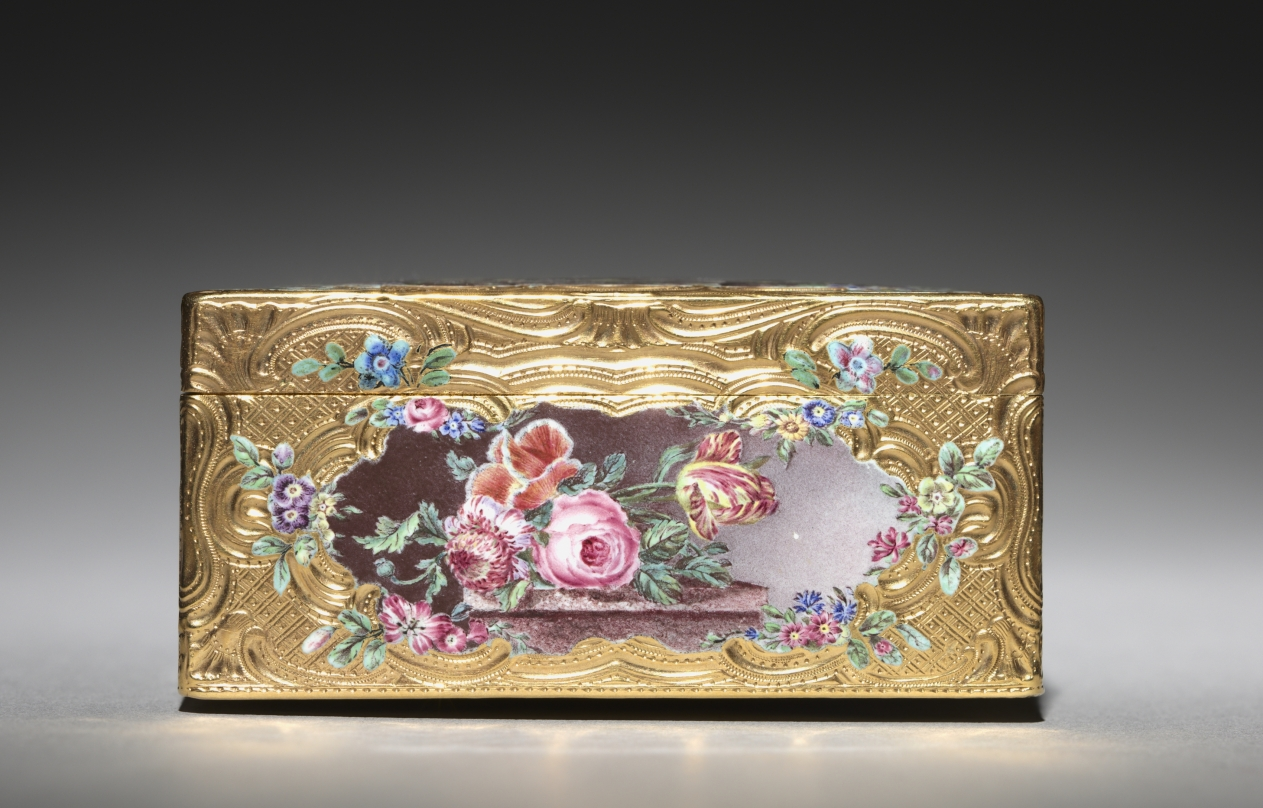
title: Snuff Box (Tabatière)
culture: France, 18th century (style of Louis XV)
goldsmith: Francois Guillaume Tiron (French)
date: 1756–57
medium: gold and enamel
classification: Miscellaneous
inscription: [Maker's mark of Francois-Guillaume Tiron, master goldsmith in 1747, inside cover; left wall]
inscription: [Warden's mark for Paris, 1756-1757, inside cover]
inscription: [Charge mark of Julien Berthe, Paris, 1750-1756, inside cover; left wall]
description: The miniature paintings that decorated snuff boxes were depicted in intricate detail requiring complex technical skill. This box’s miniatures are painted with enamel en plein, meaning the enamel has been applied directly to the metal of the box. A different enameling technique, basse-taille, is used to depict the doves and floral borders. Here, the gold has been chiseled away and filled with translucent enamel in order to produce a three-dimensional effect.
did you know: In the mid-1700s François-Guillaume Tiron worked alongside his brother, Jean-Marie Tiron, one of the most celebrated makers of gold boxes of the 18th century.